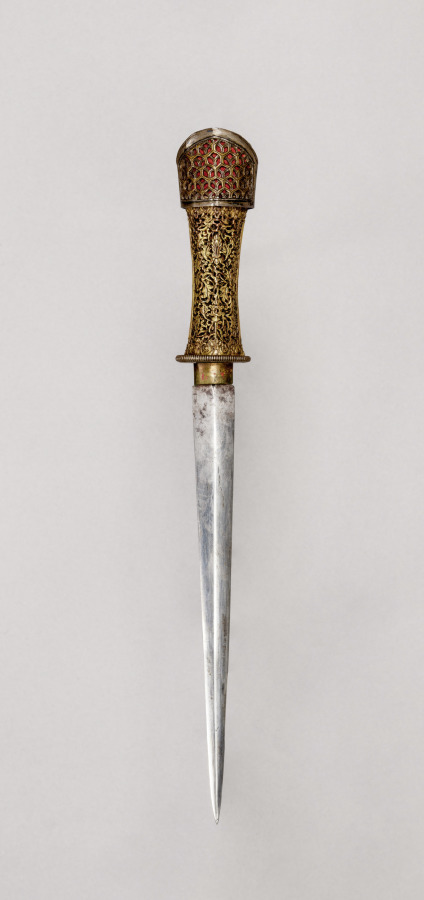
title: Dagger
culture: Northeast India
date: c. 1750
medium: brass with gilt grip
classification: Arms and Armor